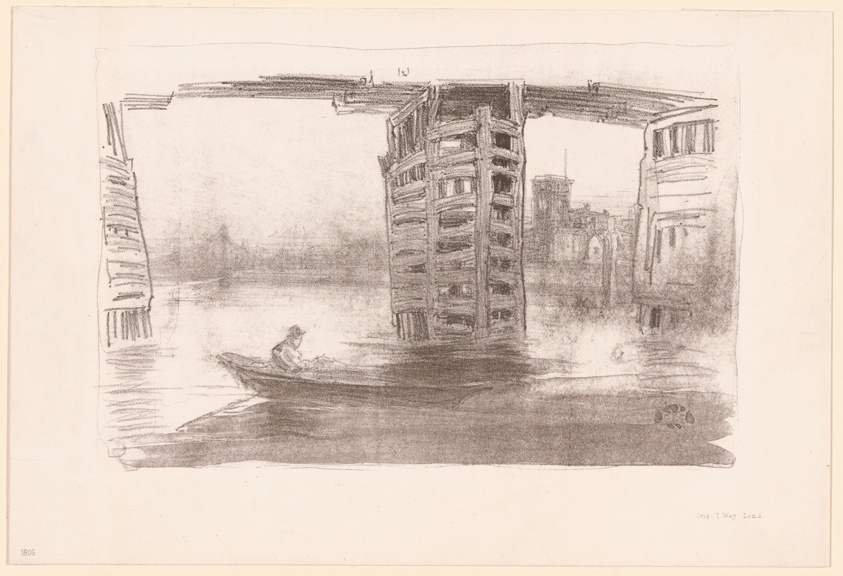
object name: Print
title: The Broad Bridge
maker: James McNeill Whistler (American, 1834-1903)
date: 1878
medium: Lithotint in brown ink, with scraping, on ivory plate paper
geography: United States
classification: lithotint; lithograph; print; prints and drawing; paper